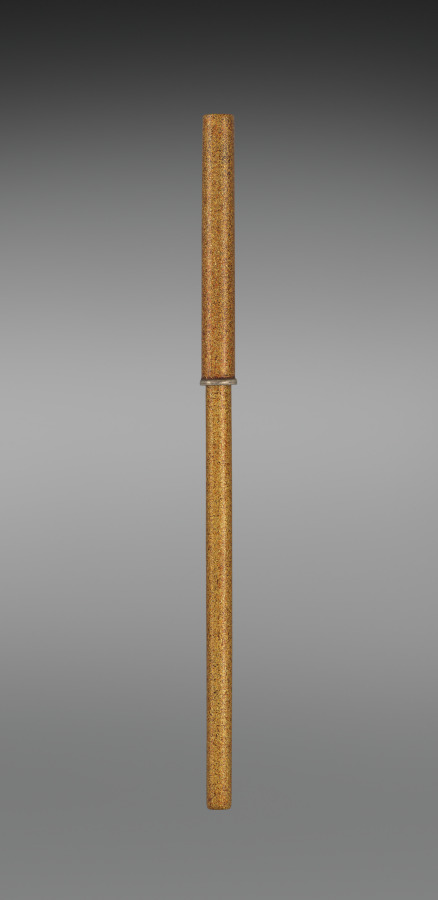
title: Writing Box (Suzuribako) with the “First Song” (Hatsune) Chapter from the Tale of Genji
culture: Japan, Meiji period (1868–1912)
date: early 1900s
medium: Lacquered wood with gold and silver sprinkled powder (maki-e), foil application (kirikane), and metal inlay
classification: Lacquer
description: The design of this box was inspired by an object in the 1639 lacquer wedding set of Chiyohime, the daughter of the shogun (ruler). Information about the set became available in the Meiji period, leading some lacquer artists to emulate its designs. This box features a scene from the chapter “First Song” (Hatsune) of the Tale of Genji, in which Prince Genji and his love Murasaki enjoy her garden. It incorporates the written characters for “first” (初, hatsu) and “sound” (音, ne), indicating the first song of the warbler in spring, associated with the new year—the water dropper for mixing the ink is in the shape of this bird.